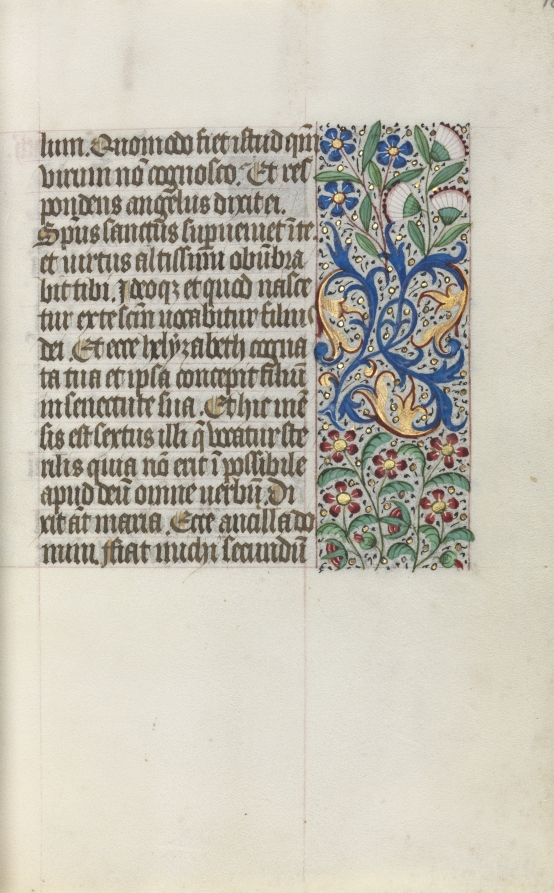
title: Book of Hours (Use of Rouen): fol. 16r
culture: France, Rouen, 15th century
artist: Master of the Geneva Latini (French, active Rouen, 1460–80)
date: c. 1470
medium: ink, tempera, and gold on vellum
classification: Bound Volume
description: In the late 1400s and early 1500s Rouen was an established and important center of book production. The city’s cathedral had a wealthy chapter that spent large sums of money to commission books and to maintain its extensive library. The stationers and booksellers would have likely been concentrated in or near the cathedral precinct. This artist, named after a manuscript now in Geneva, was Rouen’s principal illuminator during the second half of the 1400s.